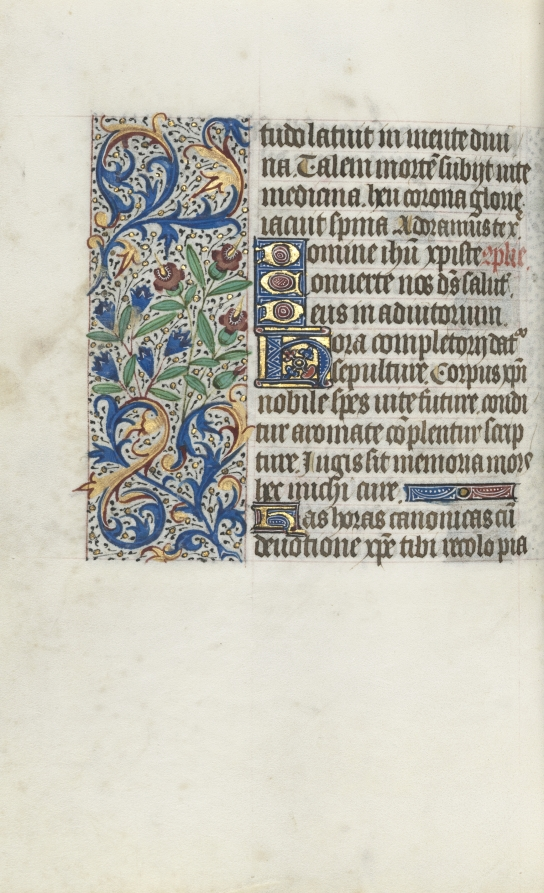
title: Book of Hours (Use of Rouen): fol. 98v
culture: France, Rouen, 15th century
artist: Master of the Geneva Latini (French, active Rouen, 1460–80)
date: c. 1470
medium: ink, tempera, and gold on vellum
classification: Bound Volume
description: In the late 1400s and early 1500s Rouen was an established and important center of book production. The city’s cathedral had a wealthy chapter that spent large sums of money to commission books and to maintain its extensive library. The stationers and booksellers would have likely been concentrated in or near the cathedral precinct. This artist, named after a manuscript now in Geneva, was Rouen’s principal illuminator during the second half of the 1400s.